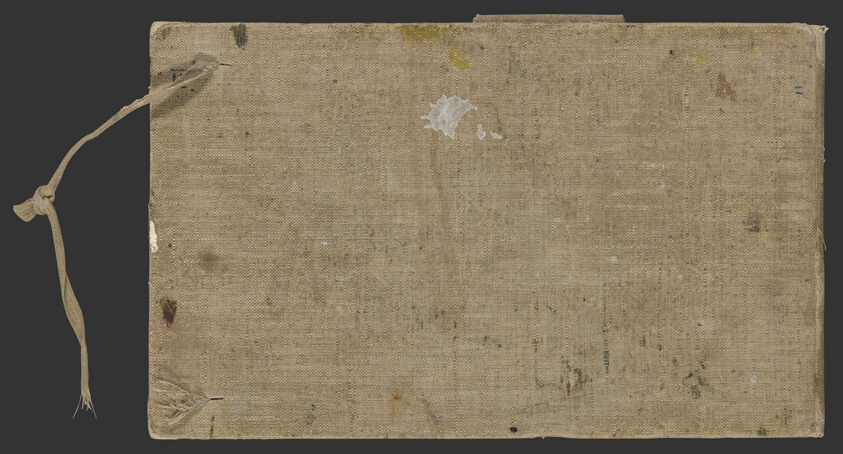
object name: Drawing and Watercolor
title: Sketchbook No. 2 (L'Estaque)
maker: Paul Cézanne; French, 1839-1906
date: 1875–86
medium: Graphite and pen and ink drawings on paper, bound into a book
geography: France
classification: sketchbook; graphite; prints and drawing; paper